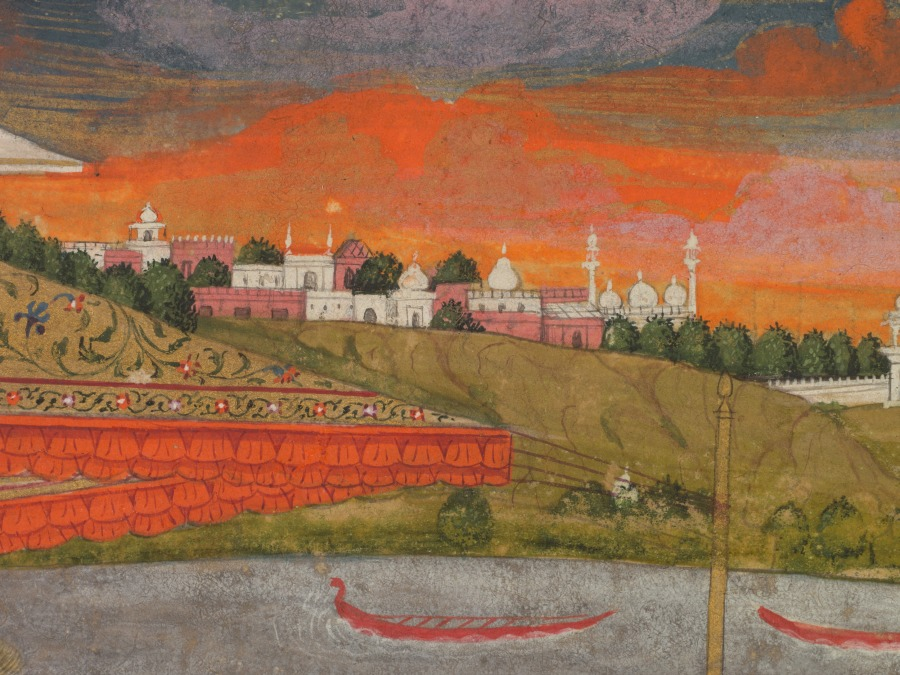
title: A blindfolded suitor is brought before a princess (recto)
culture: India, Lucknow, Mughal, 18th century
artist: Fayzullah (Indian, active c. 1730–1765)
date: 1755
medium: Gum tempera and gold on paper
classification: Painting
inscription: signed in two places: on capital of central pillar: 'amal - i Fayzullah ("the workof Fayzullah"), and below: bi - qalam i Fayzullah Musavvir walad - i Faqirullah Musavvir dar sanna 1755 ("by the pen of Fayazullah the painter son of Faqirullah the painter in the the year 1755")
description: In a scene set on a carpeted terrace in the women’s palace quarters, an older woman of the harem drags a young prince with a white blindfold over his eyes before a princess grasping a document. Such a scene evokes a literary allusion of a princess who selects her suitor, but it also resonates with circumstances at the Mughal court. Signed and dated by the artist, this painting was completed at a time when powerful women wielded control over the emperor, and Ahmad Shah Bahadur (reigned 1748–54), son and successor of Muhammad Shah, had been blinded and deposed less than one year before.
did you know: A gigantic crocodile swallows a horse and rider attempting to cross the river.